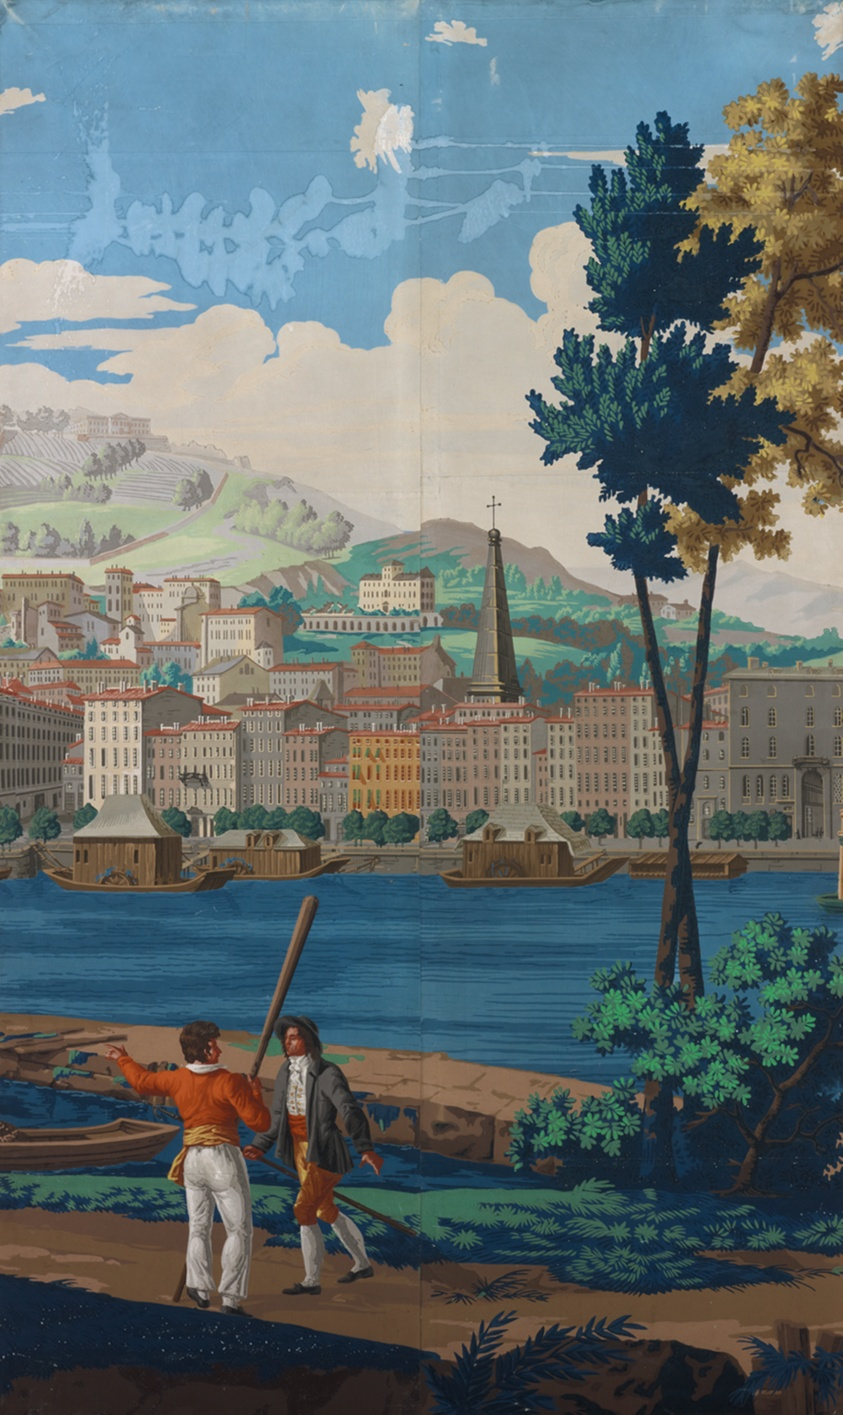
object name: Coverings and Hangings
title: Two Joined Panels: The Views of Lyon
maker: France, Paris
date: First edition, 1821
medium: Block-printed, color on paper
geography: France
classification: wallpaper; paper; european decorative arts